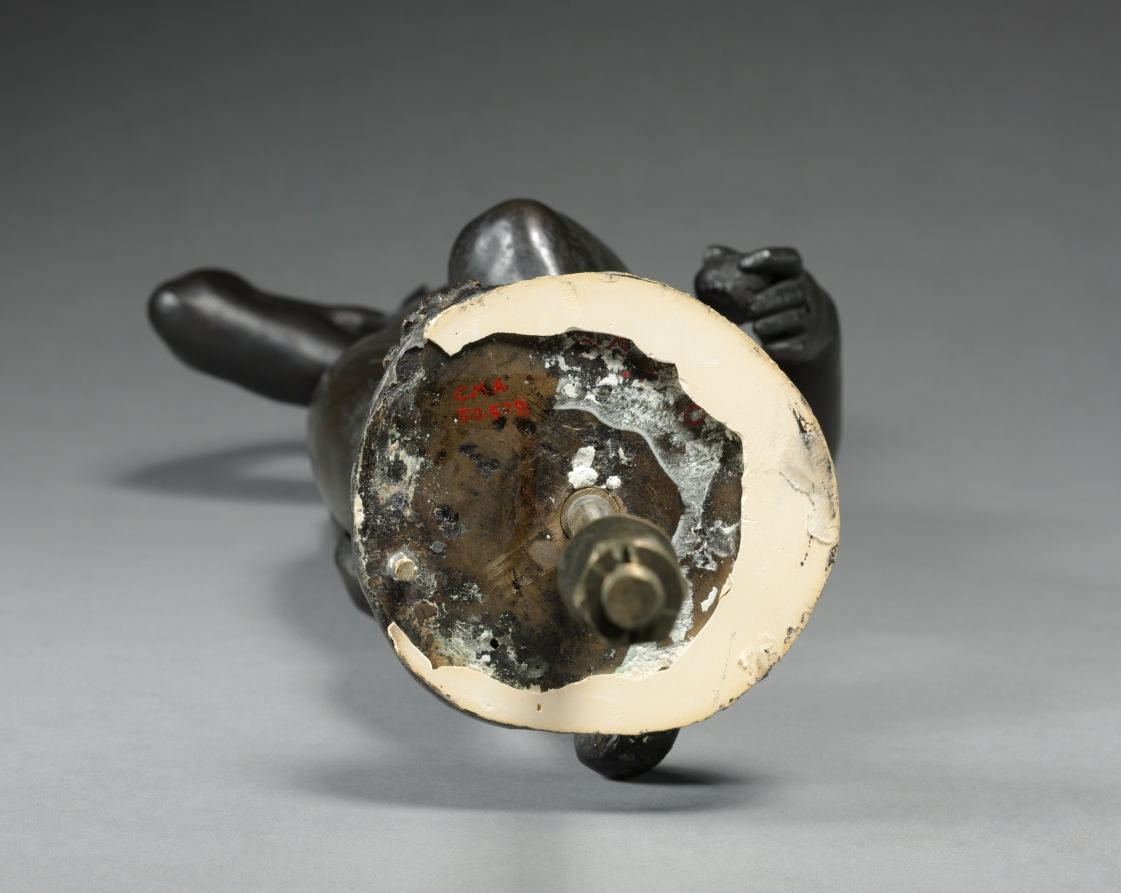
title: Venus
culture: Italy, 16th century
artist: Danese Cattaneo (Italian, 1509–1573)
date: c. 1560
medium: bronze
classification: Sculpture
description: Cattaneo's Venus is reminiscent of the ancient Aphrodite of Knidos by Praxiteles (Greek, c. 375–340 BC), as Venus holds her drapery in her right hand, leaving her body fully exposed. This work recalls Cattaneo's bronze sculptures of goddesses with the unbalanced curvature of the body and elaborately sculpted hair. Along with the hands and feet, the back of the figure is largely unfinished, indicating that it probably originally stood against a wall or in a niche.